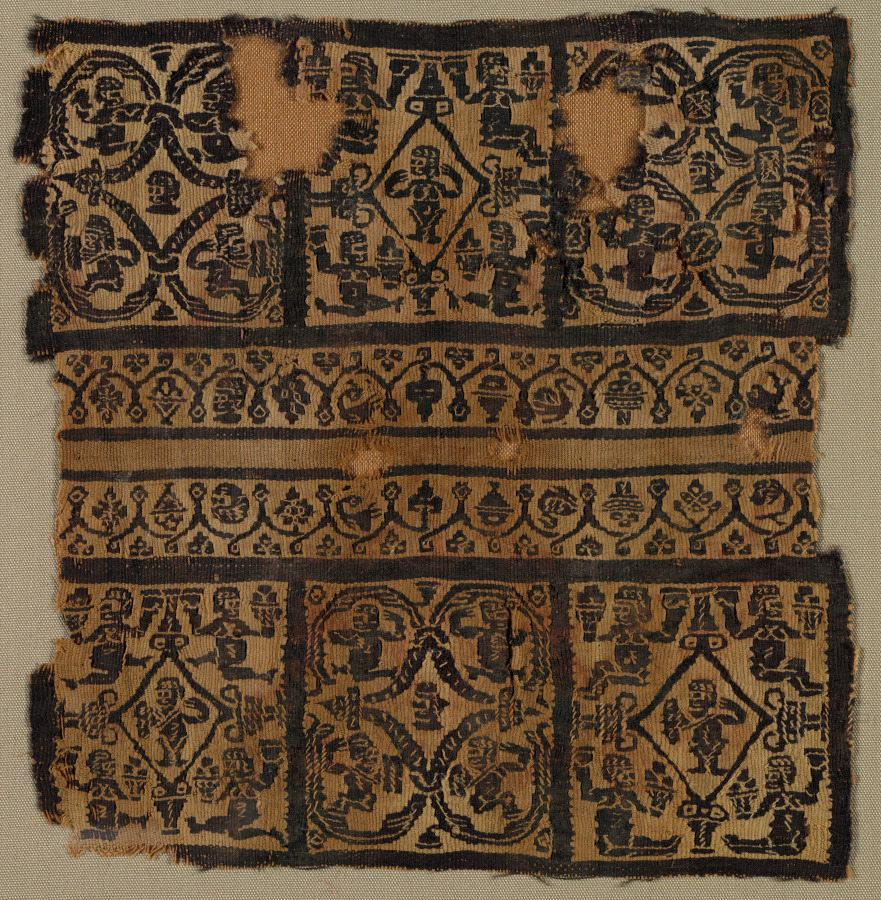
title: Fragments, Sleeve Ornament from a Tunic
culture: Egypt, Byzantine period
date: 500s - early 600s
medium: tapestry (probably originally inwoven in tabby ground); wool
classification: Textile